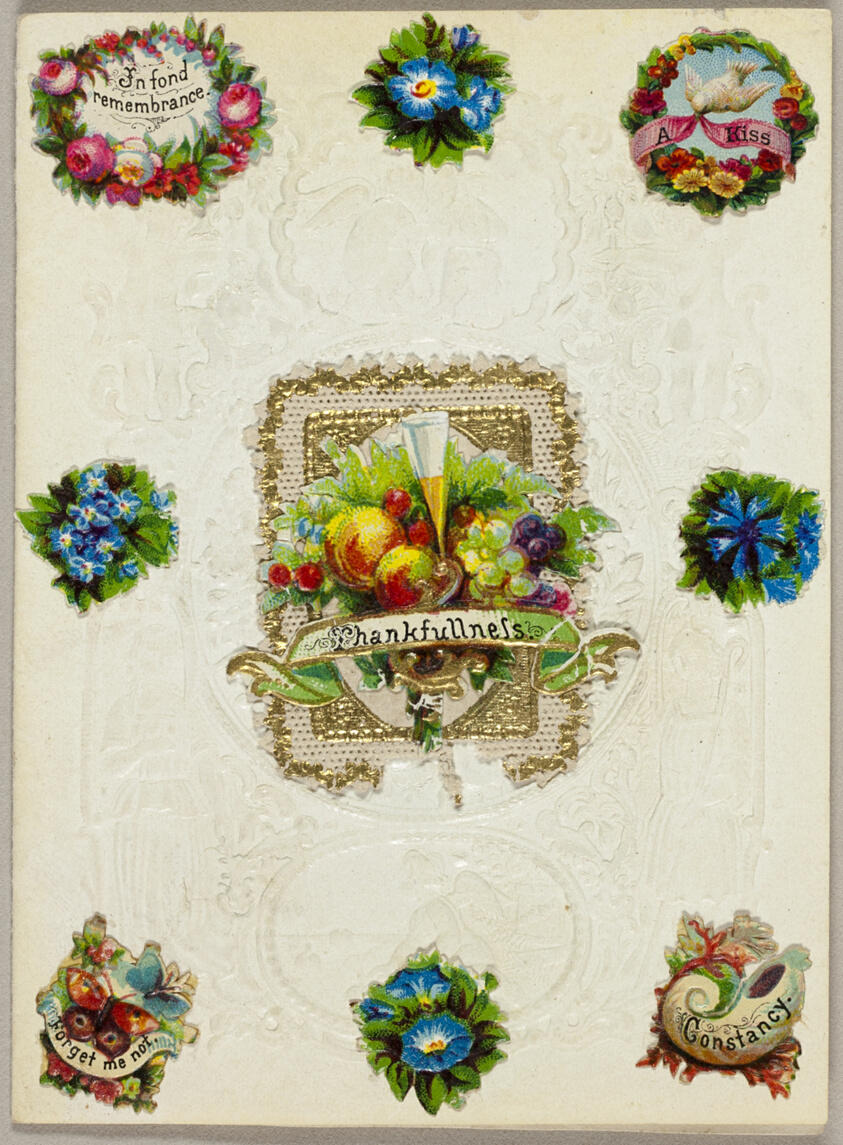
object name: Drawing and Watercolor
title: Thankfullness (valentine)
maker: John Windsor (English, 19th century)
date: 1860/70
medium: Collaged elements on embossed (designed) and coated ivory paper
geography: England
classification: collage; valentine; prints and drawing; paper